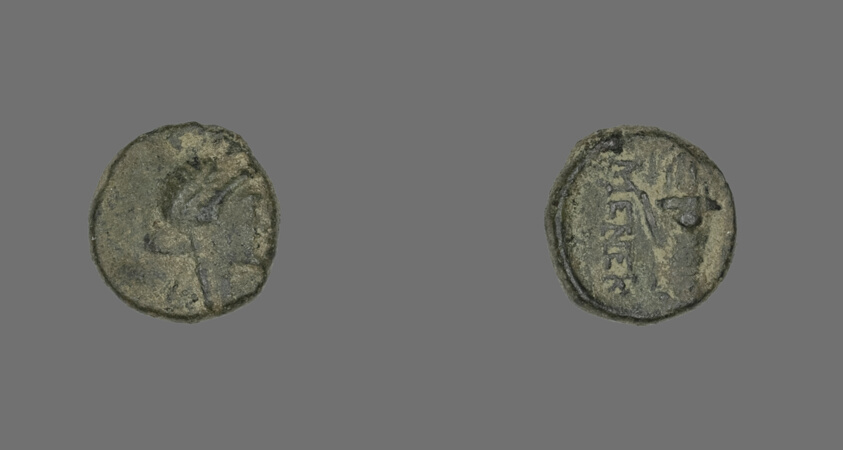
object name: Coin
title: Coin Depicting a Female Head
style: greek, ancient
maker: Greek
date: 3rd century CE (?)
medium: Bronze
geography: Ancient Greece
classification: coin; ancient art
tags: female